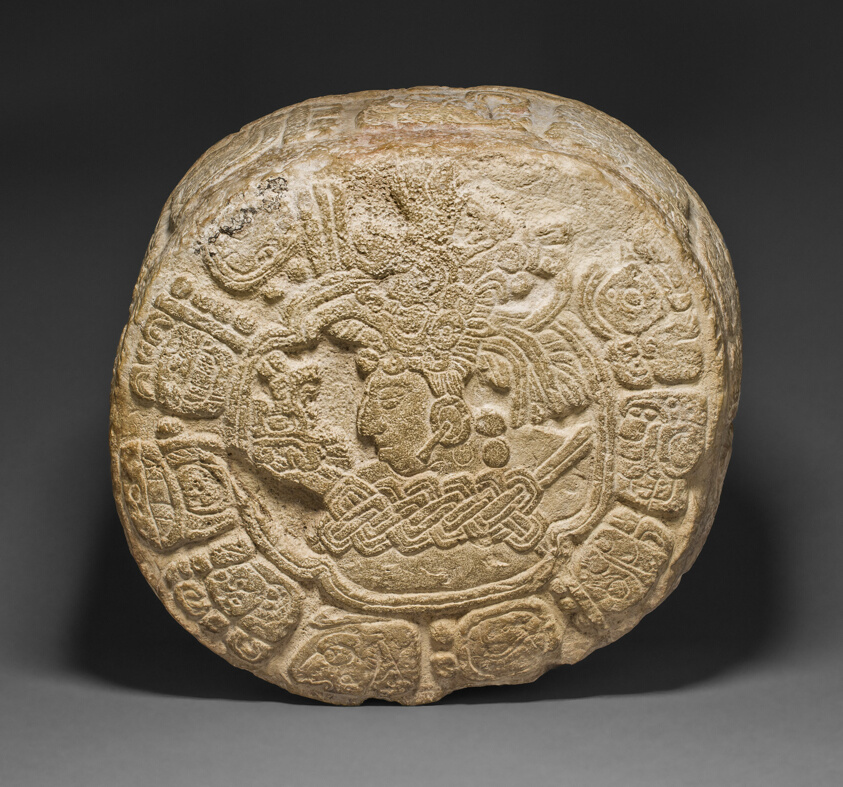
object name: Sculpture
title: Hieroglyphic Altar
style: maya, late classic, classic, mesoamerican, Pre-Columbian, americas, Arts of the Americas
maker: Late Classic Maya; Possibly Bonampak/Lacanha area, Mexico or Guatemala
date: 650–700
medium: Limestone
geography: Bonampak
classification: stone; altar; sculpture; art of the americas; carving; inscription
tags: ancestors, inscription, portraits, ritual, ritual objects, Hieroglyphs